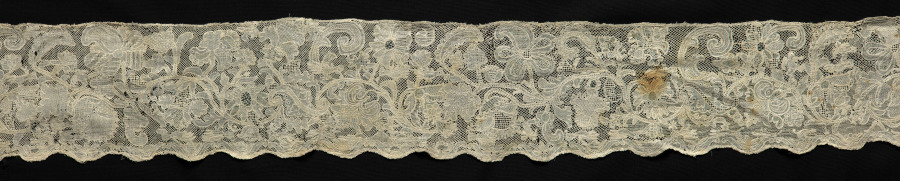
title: Flounce for Alb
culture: Unassigned, 1700s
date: 1700s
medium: Linen: needle lace (drawnwork) and embroidery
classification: Lace